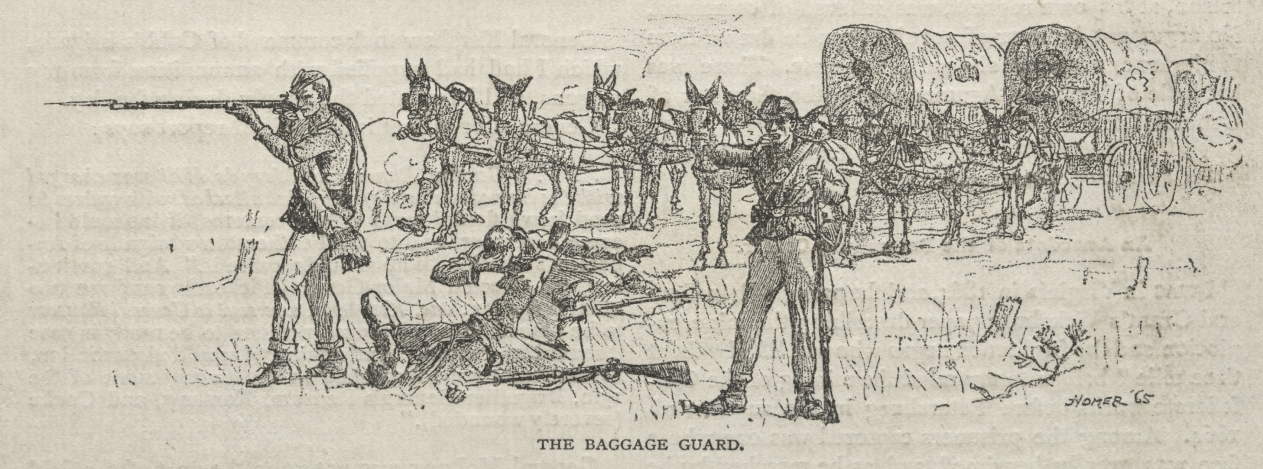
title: The Baggage Guard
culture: America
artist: Winslow Homer (American, 1836–1910)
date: 1888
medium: wood engraving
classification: Print